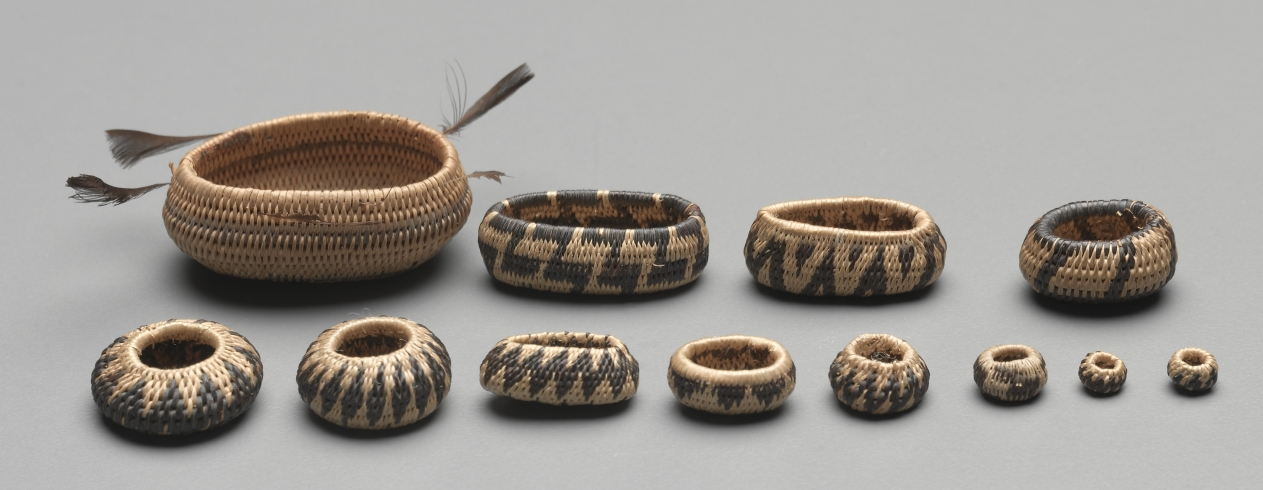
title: Miniature Round Basket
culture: California, Pomo, late 19th-early 20th century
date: late 1800s-early 1900s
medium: plant materials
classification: Basketry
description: Miniature baskets were made to demonstrate the basket-maker’s virtuoso skill, and these tiny marvels seem to be no exception—the smallest are only five millimeters wide but still patterned. For such fine work, dexterity was required as much for preparation of materials as for weaving.